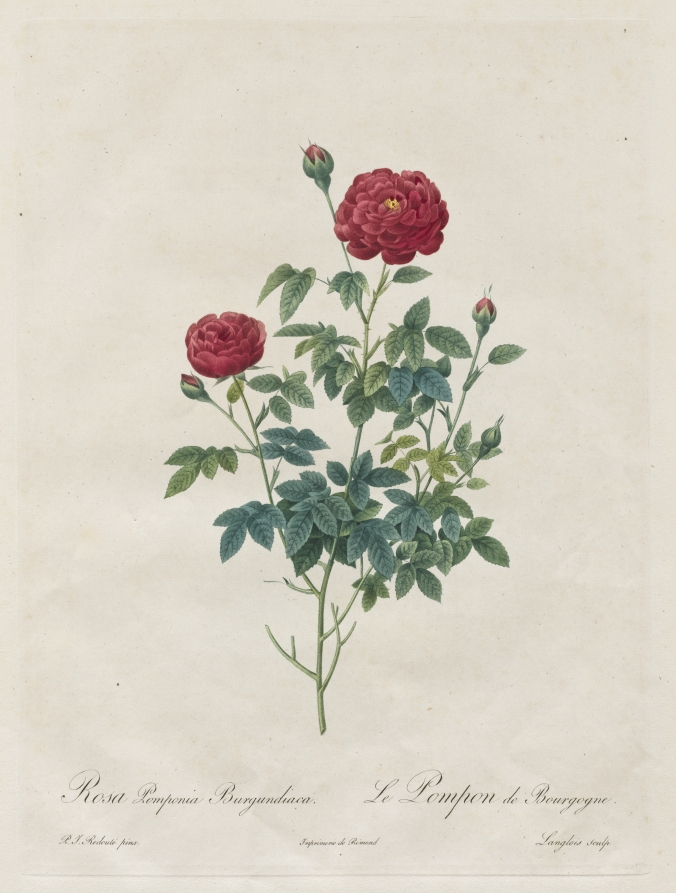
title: Pompon Rose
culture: France, 19th century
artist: Henri Joseph Redouté (French, 1766–1853)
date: 1817–1824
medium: stipple and line engraving, with hand coloring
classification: Print